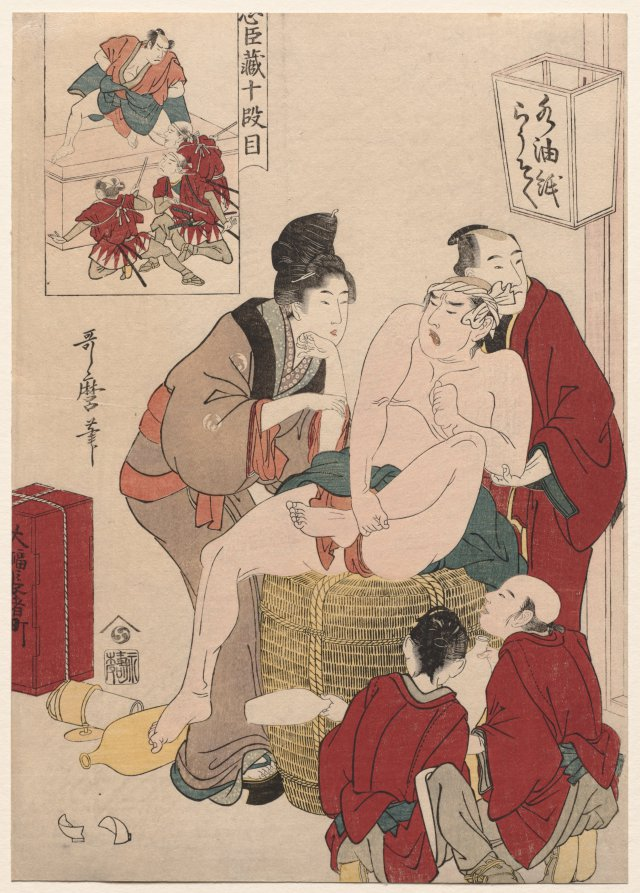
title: Chushingura: Act X of The Storehouse of Loyalty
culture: Japan, Edo period (1615–1868)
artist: Kitagawa Utamaro (Japanese, c. 1754–1806)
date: late 1790s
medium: color woodblock print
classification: Print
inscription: Artist's signature: Utamaro hitsu.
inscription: Publisher: Nishimuraya Yohachi (Eiju han, emblem).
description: Stage version: The hero Gohei bravely plants himself on a chest of armor and weapons to prevent government officials from discovering them before they are smuggled out of the house. He holds off the officials by claiming that the chest contains personal belongings of the lady of the house. Exposing these items would bring her humiliation and dishonor. See Chushingura: Perspective Picture for the "Treasure House of Loyalty" (CMA 1985.338.10). Parody print: Utamaro converted this moment of lofty bravery into one of humor. A drunkard guards a cask of sake to prevent the maid from opening it.